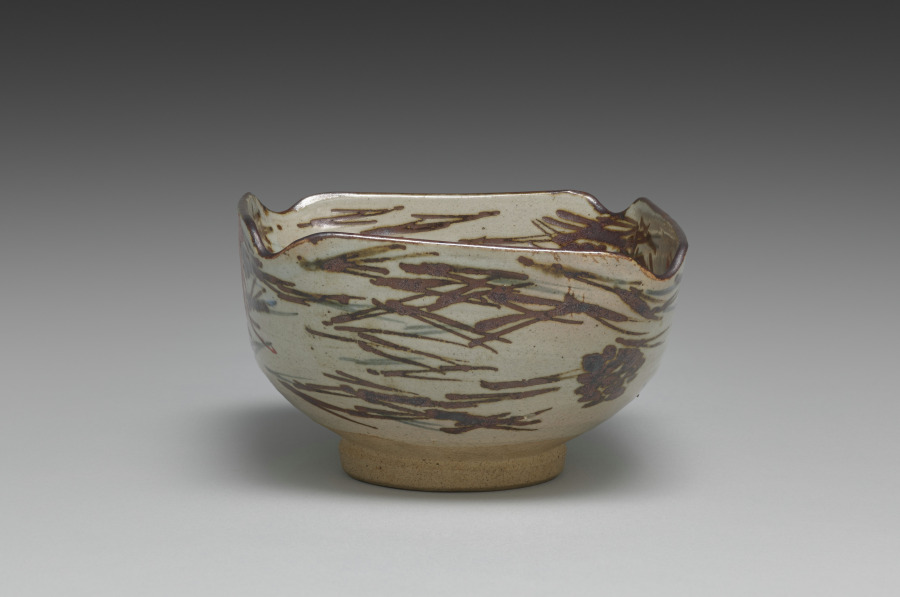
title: Nesting Dish with Scattered Pine Needles and Maple Leaves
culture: Japan, Edo period (1615–1868)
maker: Seifū Yohei I (Japanese, 1801–1861)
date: 1861–78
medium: One of a pair of side dishes; stoneware with underglaze blue and iron oxide, white slip, and overglaze color enamel (Kyoto ware)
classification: Ceramic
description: Seifū Yohei I made both blue and white porcelains after Ming dynasty (1368–1644) Chinese wares fired in the kilns at Jingdezhen for export. He also made colorful stoneware in the style of his teacher, Nin’ami Dōhachi (Takahashi Dōhachi II) (1783–1855).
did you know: Where he intended to place the maple leaves, Yohei I first applied a white color, which can be seen around the leaf edges under the glaze. This layering on top of the white brightens the color of the translucent red overglaze.